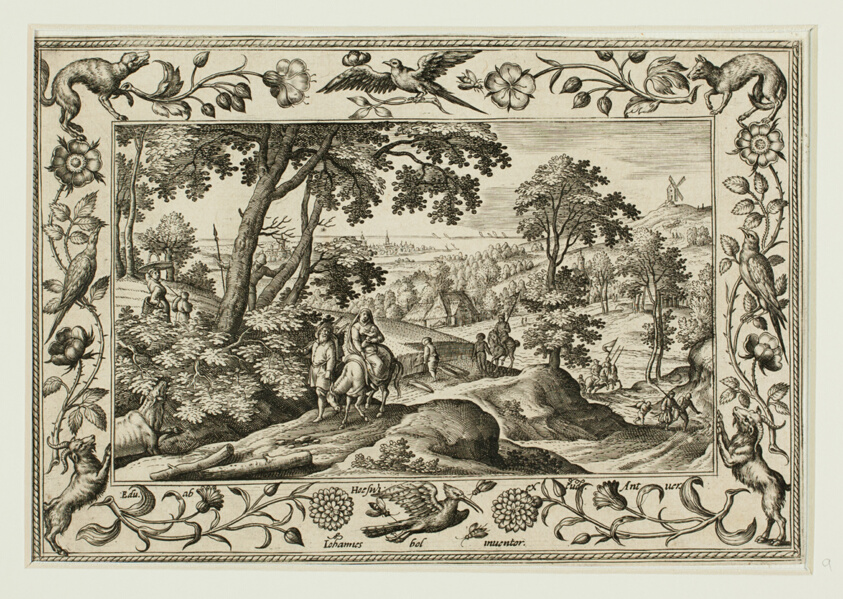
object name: Print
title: The Flight into Egypt, from Landscapes with Old and New Testament Scenes and Hunting Scenes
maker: Adriaen Collaert (Flemish, c. 1560–1618); after Hans Bol (Flemish, 1535–1593); published by Anna van Hoeswinckel (Flemish)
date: 1584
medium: Engraving in black on cream laid paper, laid down on cream laid paper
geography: Flanders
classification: engraving; paper; print; prints and drawing